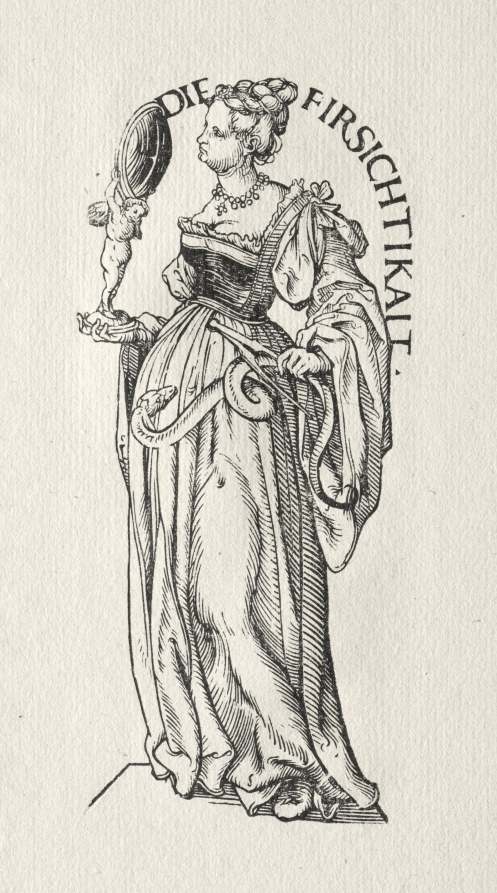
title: Seven Virtues: Prudence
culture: Germany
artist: Hans Burgkmair (German, 1473–1531)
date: 1510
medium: woodcut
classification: Print